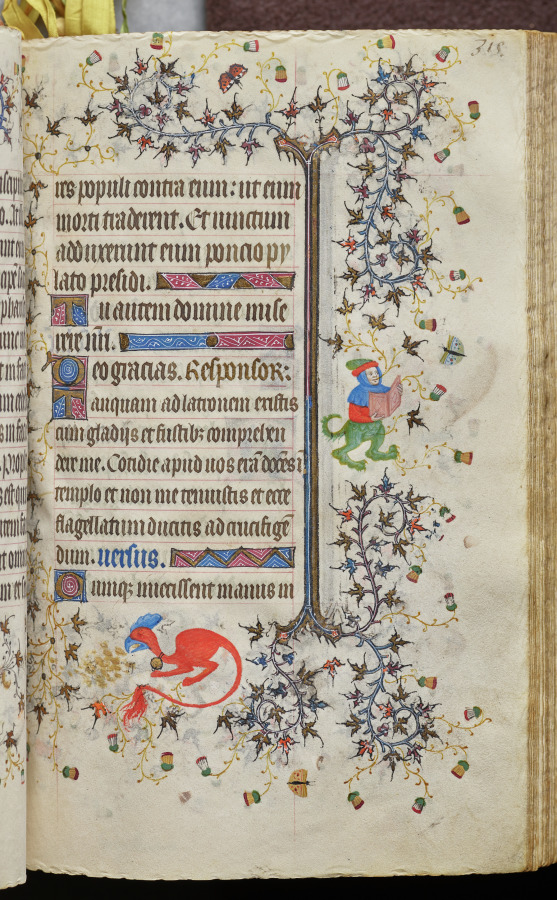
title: Hours of Charles the Noble, King of Navarre (1361-1425): fol. 158r, Text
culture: France, Paris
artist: Master of the Brussels Initials and Associates (French)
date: c. 1405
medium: ink, tempera, and gold on vellum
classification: Bound Volume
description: This precious volume was obviously highly prized by its owner, the French-born King of Navarre, who had his coat of arms painted on no less than twenty folios. Rather than directly commissioning this manuscript from a specific workshop, it seems that Charles the Noble acquired his book of hours -- perhaps ready-made for the luxury market -- while on a trip to Paris in 1404-05. A collaborative effort, six painting styles are evidenced within the pages of this codex, those of two Italians, two Frenchmen, and two Netherlanders. The painter who was responsible for the planning and decoration of the book, and who produced seventeen of the large miniatures, was a Bolognese artist known as the Master of the Brussels Initials. His principal assistant, responsible for most of the borders, was a Florentine who signed his name "Zecho" da Firenze on folio 208 verso.